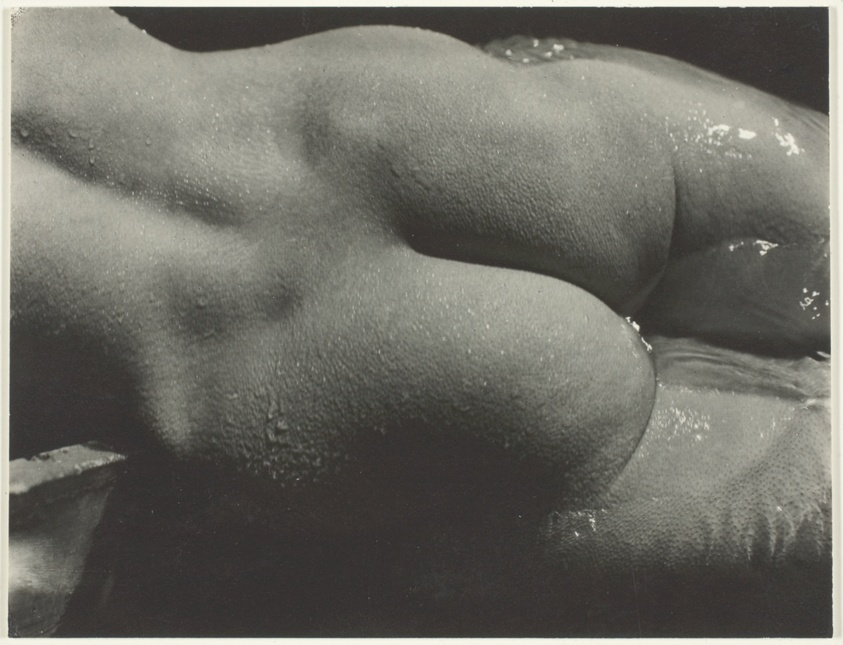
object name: Photograph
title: Rebecca Salsbury Strand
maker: Alfred Stieglitz (American, 1864–1946)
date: 1922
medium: Gelatin silver print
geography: United States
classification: gelatin silver (developing-out-paper) pr; photographic process; photography; photograph